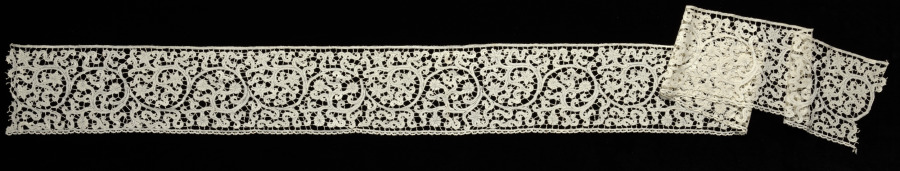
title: Lace Flounce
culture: Italy, Milan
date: 1600s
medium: Bobbin lace (Punto di Milano)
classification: Lace